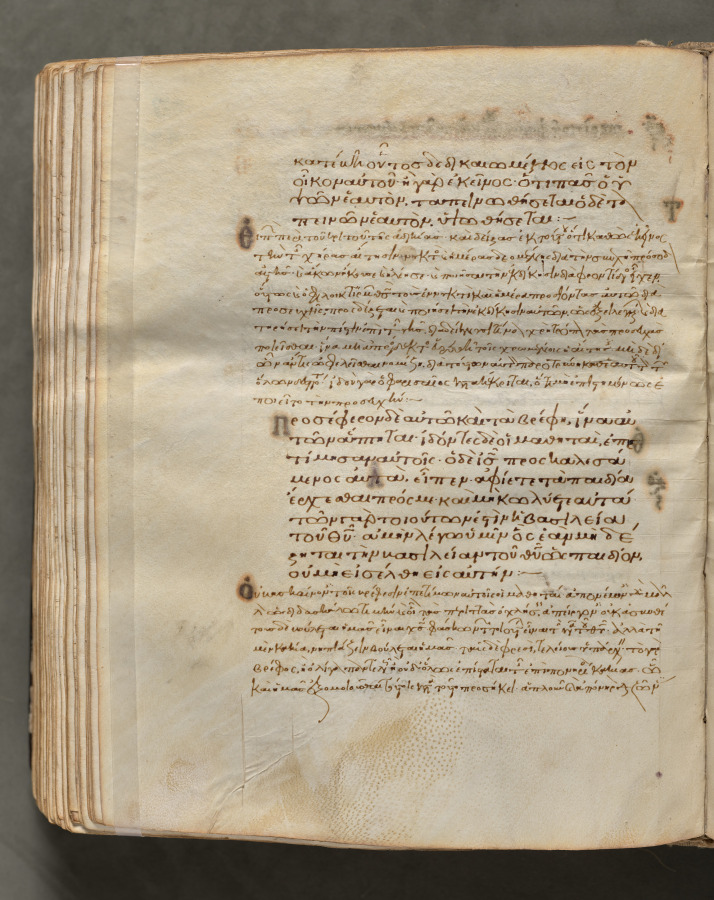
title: Text, folio 290 (verso), from a Gospel Book with Commentaries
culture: Byzantium, Constantinople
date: c. 1000–1100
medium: ink, tempera, and gold on vellum; leather binding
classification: Bound Volume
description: Each of the four gospels in this book opens on a page with brilliantly illuminated borders depicting the author of the text as well as birds—principally peacocks, symbols of the immortality of the soul—and fountains, representing the fountain of life and the salvation of the soul. This volume consists of 428 leaves with texts in Greek. Its level of sophistication suggests that it was probably written and decorated in a monastery in Constantinople.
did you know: Gospel books were carried in procession through Byzantine churches.